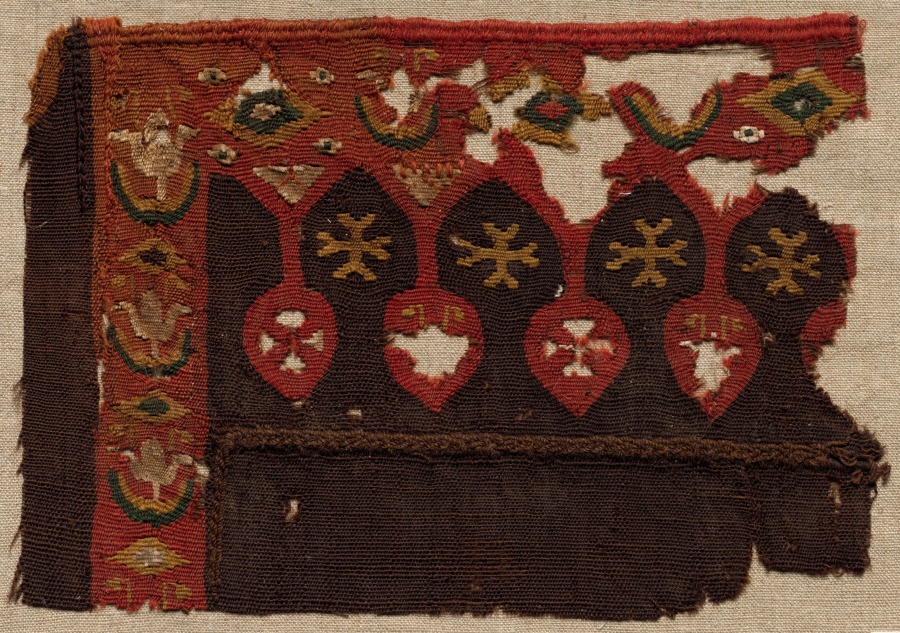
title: Fragment of a Tunic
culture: Egypt, Byzantine period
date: 400s - 600s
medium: tabby weave with interwoven tapestry ornament, linen and wool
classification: Textile